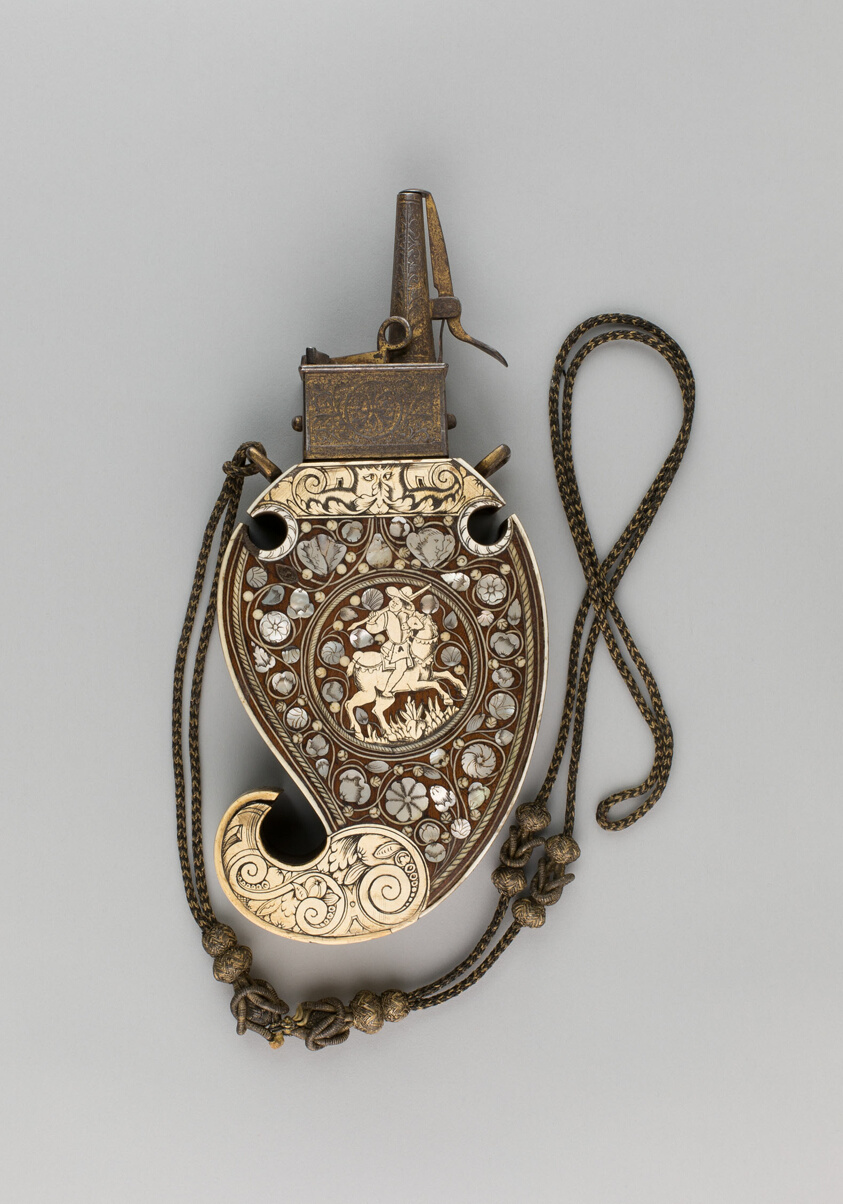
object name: Arms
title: Powder Flask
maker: German, Saxony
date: c. 1620/30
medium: Walnut, mother-of-pearl, and iron, with gilding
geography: Germany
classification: firearm-accessory; arms; arms and armor